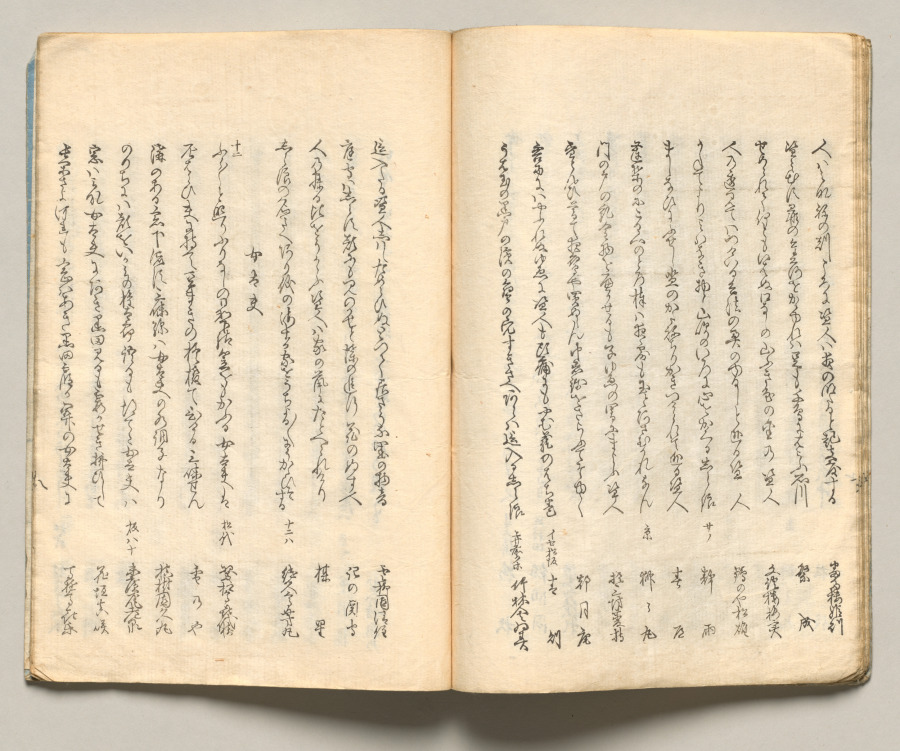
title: Spread Fifteen from Volume Six of People of Japan in Light Verse (Kyōka)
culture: Japan, Edo period (1615–1868)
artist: Utagawa Hiroshige (Japanese, 1797–1858)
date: 1857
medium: Woodblock-printed book; ink and color on paper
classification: Bound Volume